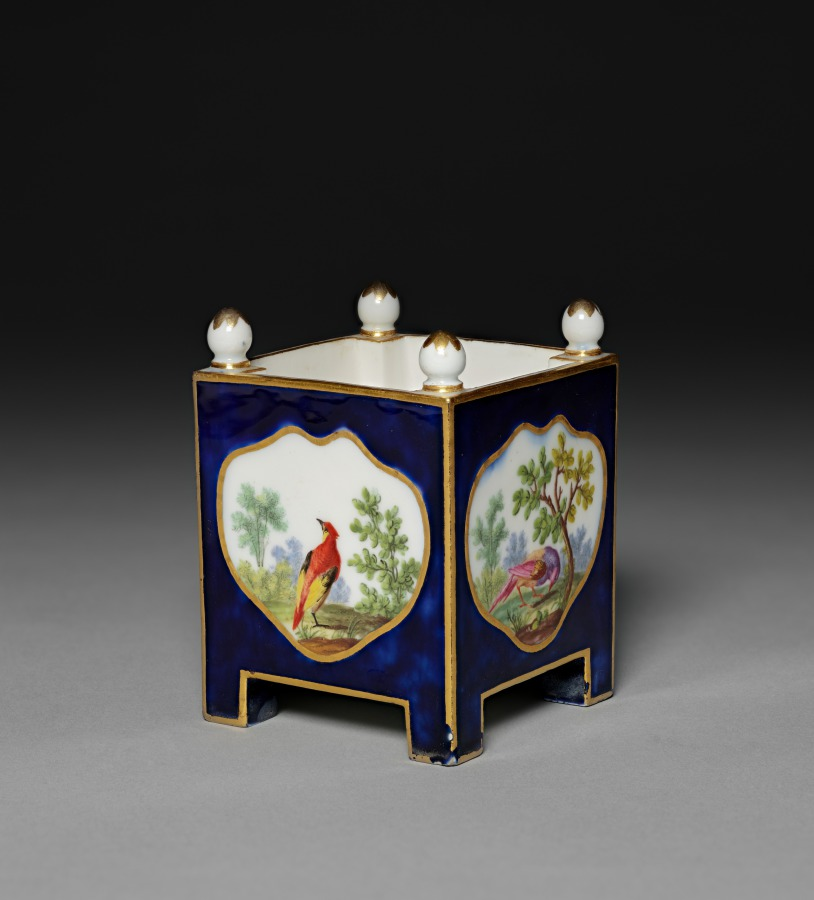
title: Tub-shaped Flower Pot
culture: France, Vincennes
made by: Vincennes Porcelain Factory (France, 1740–56)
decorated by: possibly by Etienne Evans (French, 1733–1806)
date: c. 1752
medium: soft-paste porcelain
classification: Ceramic